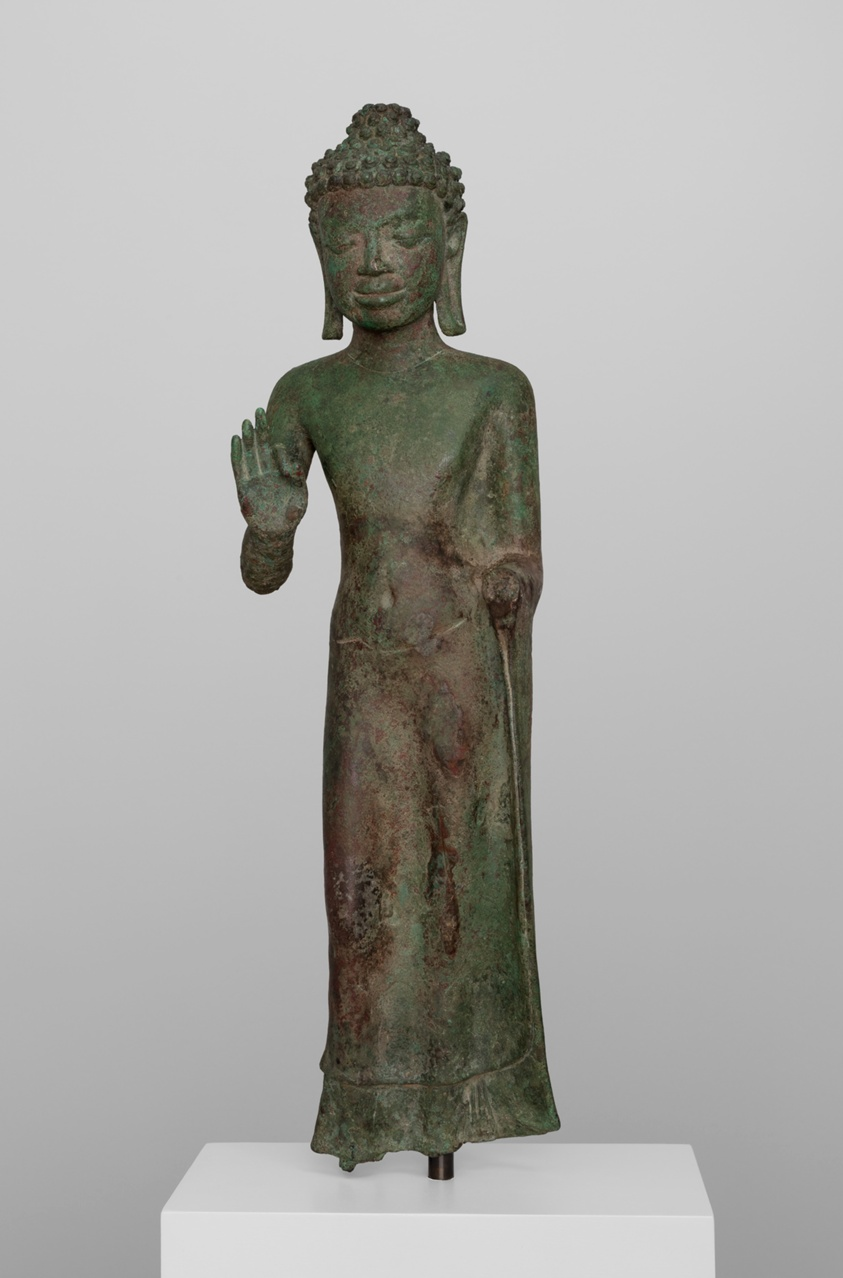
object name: Sculpture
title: Standing Buddha with Hand in Gesture of Teaching (<em>Vitarkamudra</em>)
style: Southeast Asian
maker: Thailand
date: Mon period, 8th century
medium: Bronze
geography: Thailand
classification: bronze; metal; sculpture; asian art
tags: Buddha